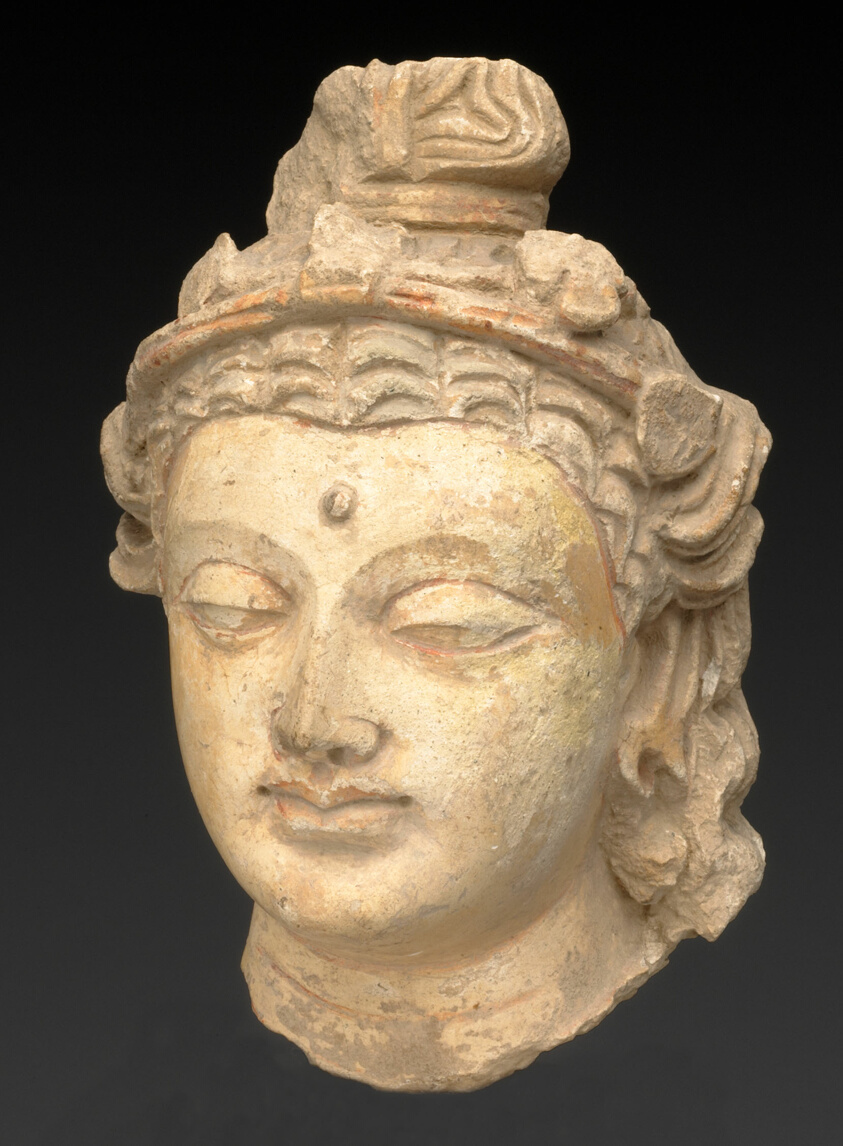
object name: Sculpture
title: Head of a Bodhisattva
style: South Asian, gandharan, kushan, Indian (South Asian), asian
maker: Afghanistan or Pakistan; Ancient region of Gandhara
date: Kushan period, About 3rd/5th century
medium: Stucco with traces of red pigment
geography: Gandhara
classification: bust/head; stuccowork; sculpture; asian art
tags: religion, bodhisattva, Buddhism